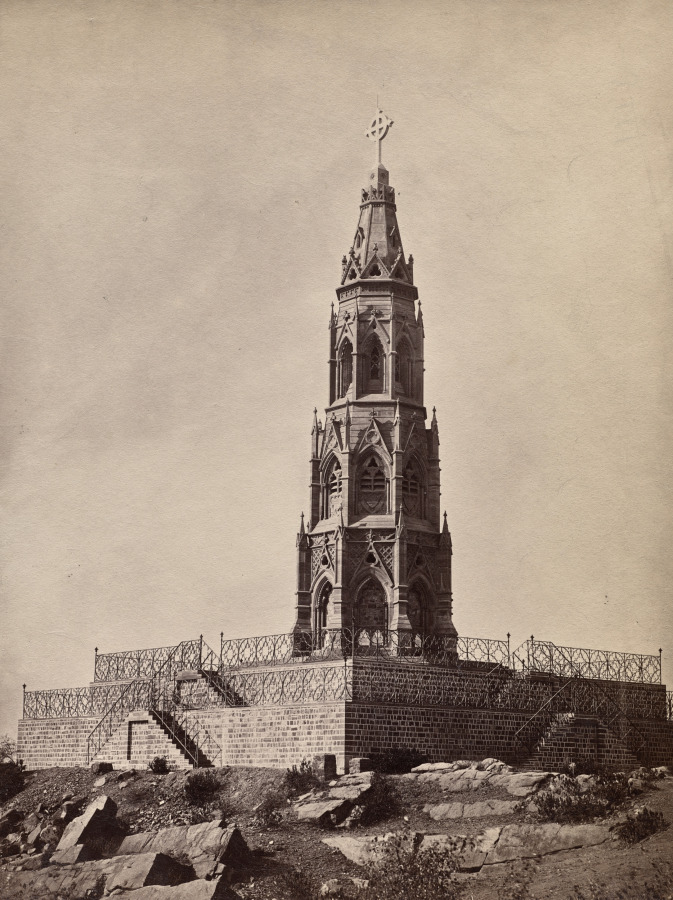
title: Memorial Monument of the British Soldiers in 1859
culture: England, 19th century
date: 1870s-1880s (?)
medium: albumen print mounted on an album page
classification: Photograph